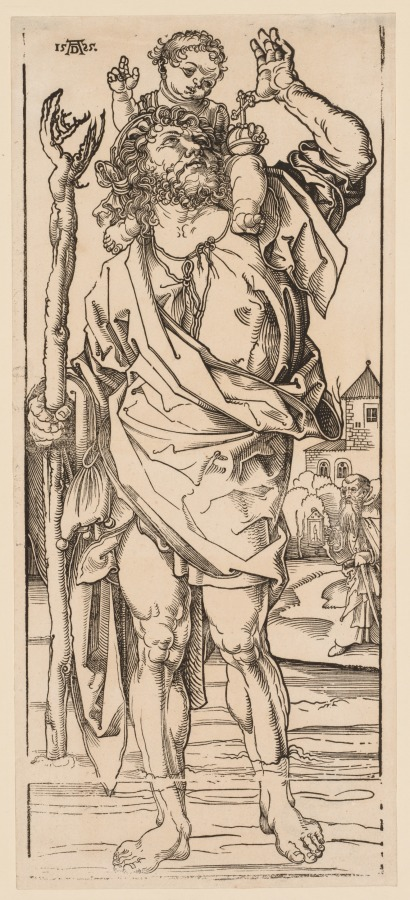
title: St. Christopher Crossing the Stream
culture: Germany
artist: Albrecht Dürer (German, 1471–1528)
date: 1528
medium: woodcut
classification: Print